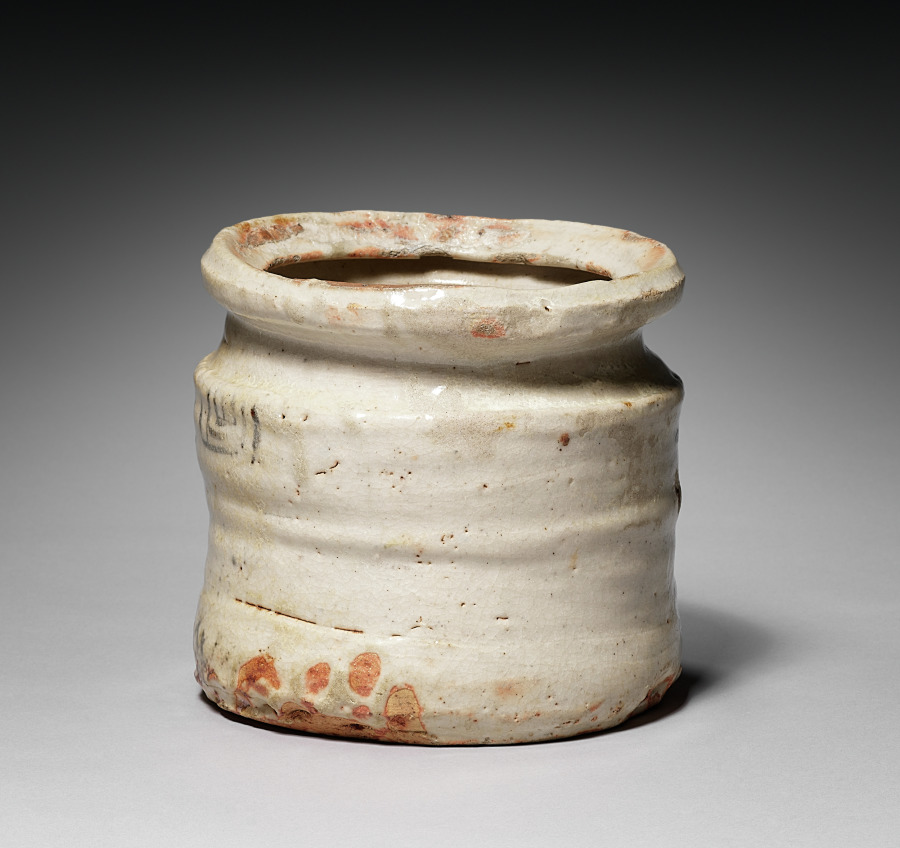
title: Water Container (Mizusashi) with Riverscape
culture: Japan, Momoyama period (1573-1615) to Edo period (1615-1858)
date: late 1500s–early 1600s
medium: Stoneware with underglaze iron oxide slip decoration (Mino ware, Shino type)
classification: Ceramic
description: Mizusashi are jars used to hold water for the preparation of tea at tea gatherings. This one was produced in the Mino area of present-day Gifu prefecture in central Japan, and is considered one of the finest of its type in existence, based on the complex aesthetic sensibilities developed around the tea ceremony in Japan. It is called a “picture Shino” (e-shino) mizusashi, as it has an abstracted design said to resemble an ink painting of reeds along a river bank and small boats in a river on one side, and a geometric pattern on the other. With its irregular shape and thick, luminous glaze, it is of a variety favored by eminent tea masters of the Momoyama period.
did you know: The water this container held during a tea ceremony was used to fill the kama, or iron pot in which the water is heated.